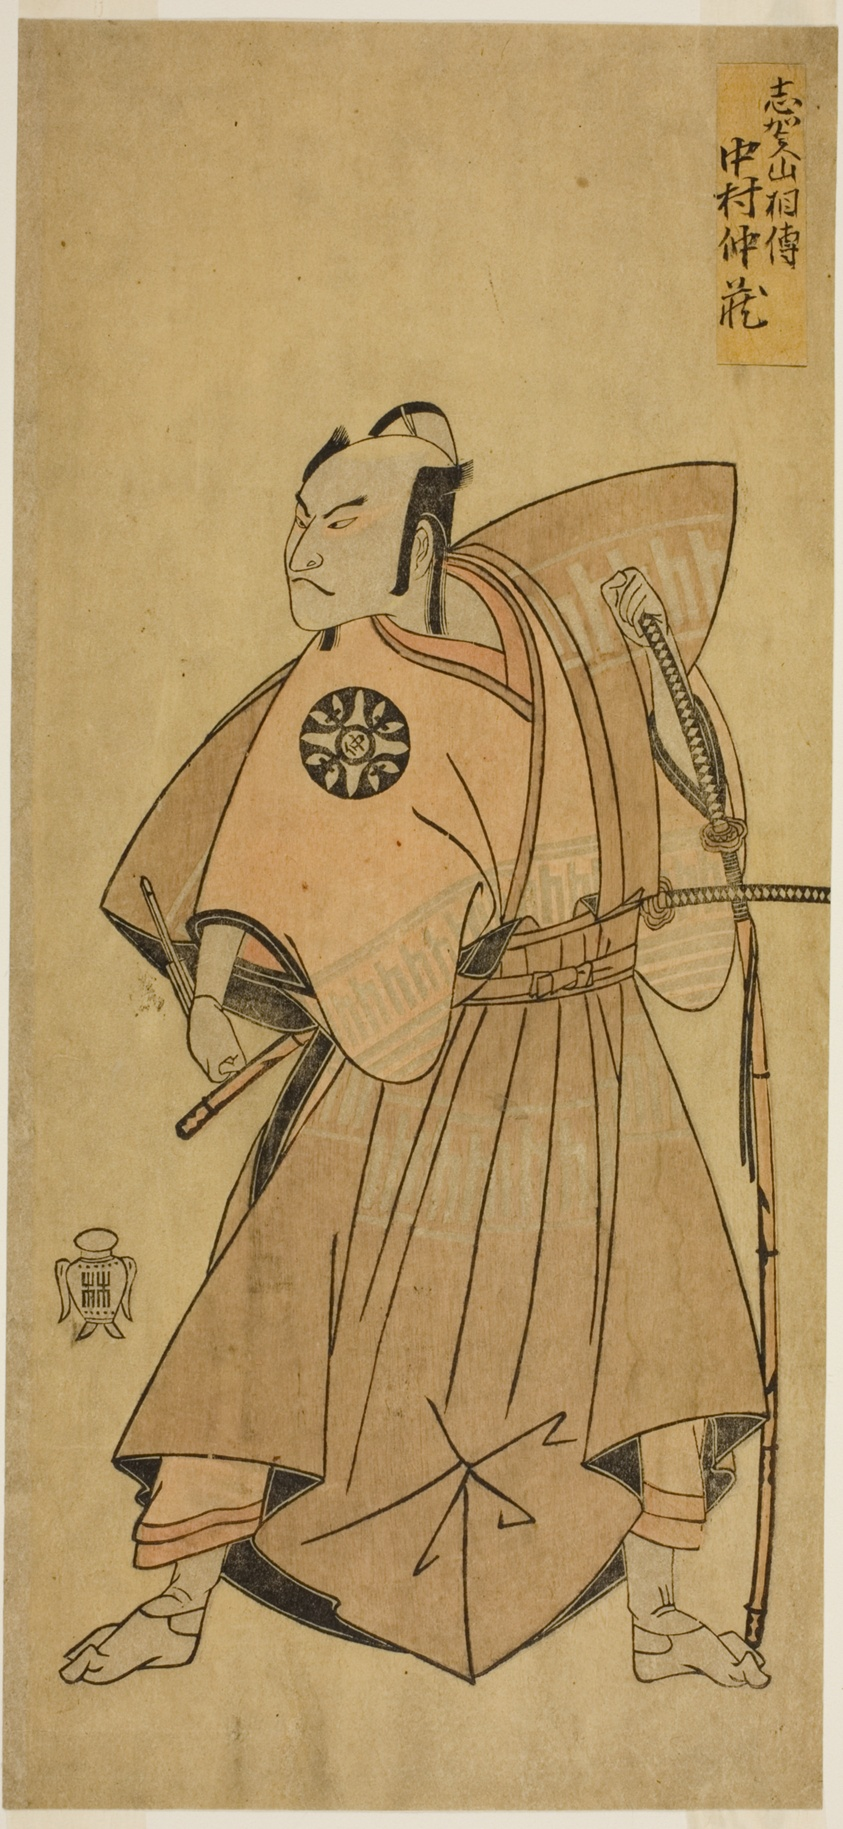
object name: Print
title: The Actor Nakamura Nakazo I as Osada no Taro (?) in the Play Ima o Sakari Suehiro Genji (?), Performed at the Nakamura Theater (?) in the Eleventh Month, 1768 (?)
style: Japanese (culture or style)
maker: Katsukawa Shunsho 勝川 春章; Japanese, 1726-1792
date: c. 1768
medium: Color woodblock print; hosoban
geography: Japan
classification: woodblock print; print; asian art